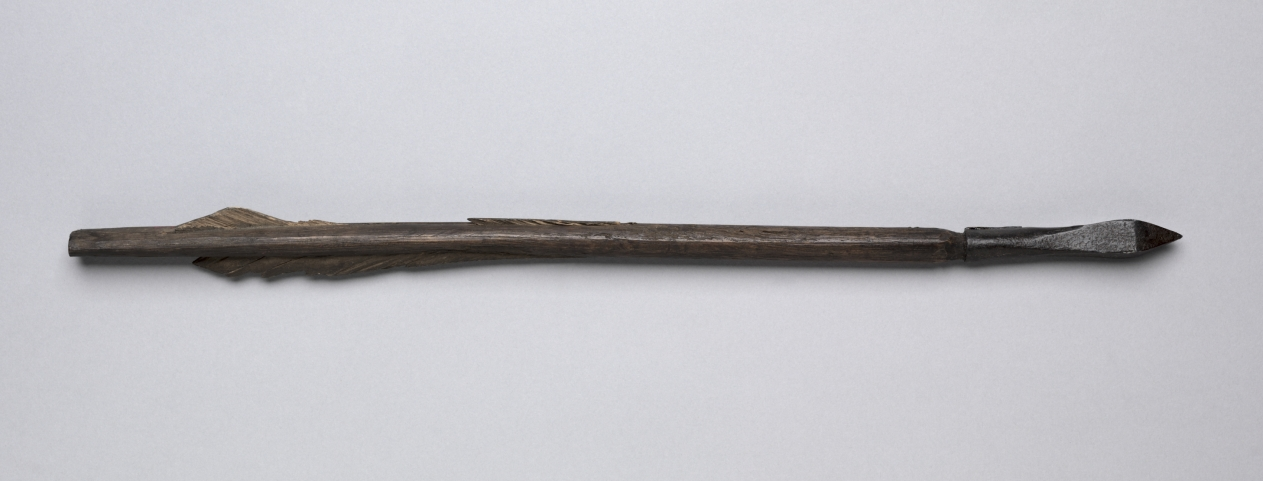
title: Crossbow Bolt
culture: Germany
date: 1500s–1600s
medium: wood, leather, steel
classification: Arms and Armor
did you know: Bolts with leather feathering were used mainly in the Tyrolean area, which includes northern Italy and western Austria.